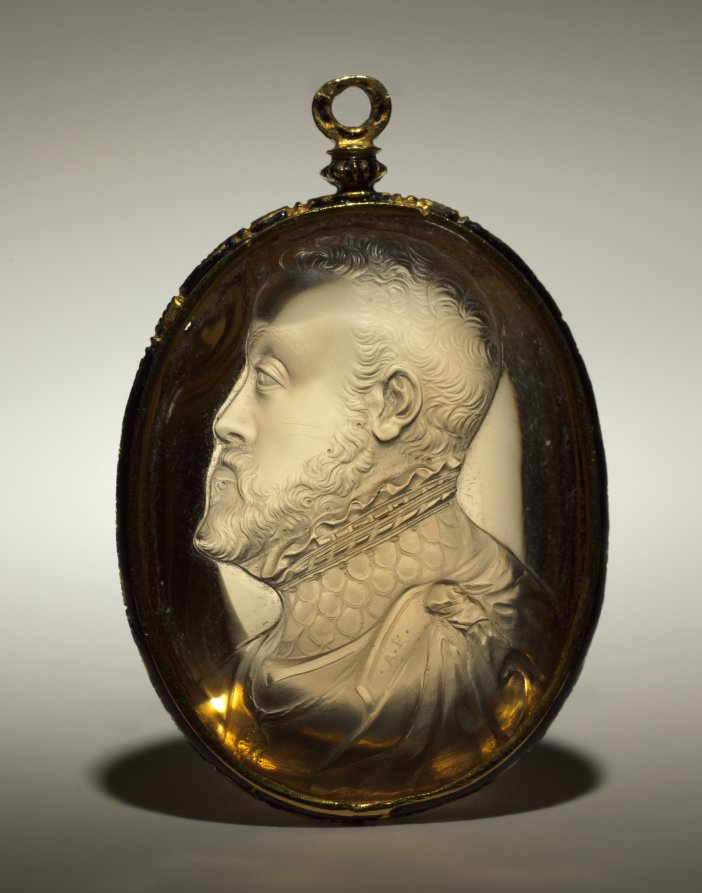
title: Portrait of Philip II, King of Spain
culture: Italy, 16th century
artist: Alessandro Cesati (Italian, before 1538-after 1564)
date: mid-1550s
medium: citrine, mounted in a gold and enamel pendant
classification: Sculpture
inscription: Signed on collar .A.E. (Likely abbreviation for “ΑΛΕΞΑΝΔΡΟΣ ΕΠΟΙΕΙ”, or “Alexandros Epoiei,” which translates to “Alexander made [me / this].”)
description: Clad in armor, Philip II wears a chain with the Order of Golden Fleece around his neck. The remarkably precise and varied cutting describes the textures of cloth, metal, skin, and hair while presenting the king’s features with striking naturalism—complete with receding hairline and prominent chin—as well as conveying his forceful character. Carved gems were luxury arts of the highest order in the Renaissance, hotly collected and used as diplomatic gifts. The original patron is not yet known, but cameos played a prominent role at the Spanish court, where the royal family often hold gems of Philip II in their portraits. The yellow quartz, rare in the 1500s, probably came from a newly opened source in South America; this object is thus both a natural marvel and a masterful portrait. One of only three known works signed by the artist (his initials appear at miniscule scale on the collar just below the knot of cloth), this stone is also likely in its original setting.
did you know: The ancient Romans believed citrine, a type of quartz, offered protection against evil thoughts.